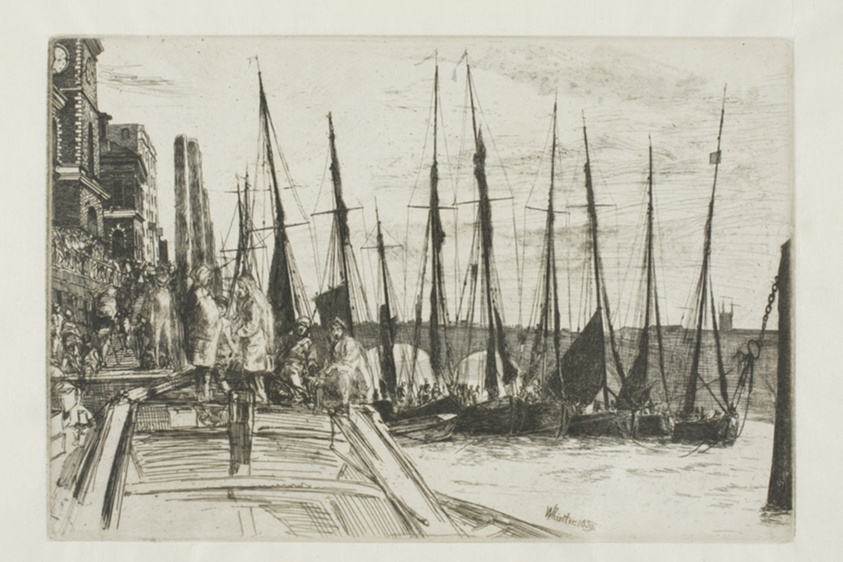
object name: Print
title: Billingsgate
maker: James McNeill Whistler (American, 1834-1903)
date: 1859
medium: Etching and drypoint with foul biting on off-white Japanese paper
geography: United States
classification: etching; foul biting; drypoint; print; prints and drawing; paper